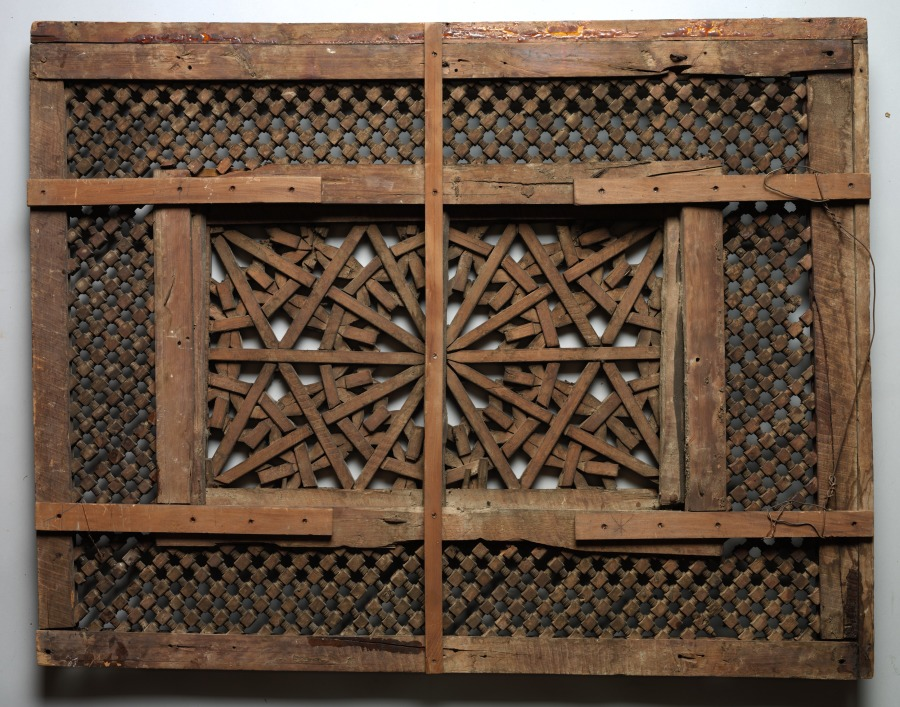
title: Carved Wood Panel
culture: India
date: 1700s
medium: wood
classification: Wood